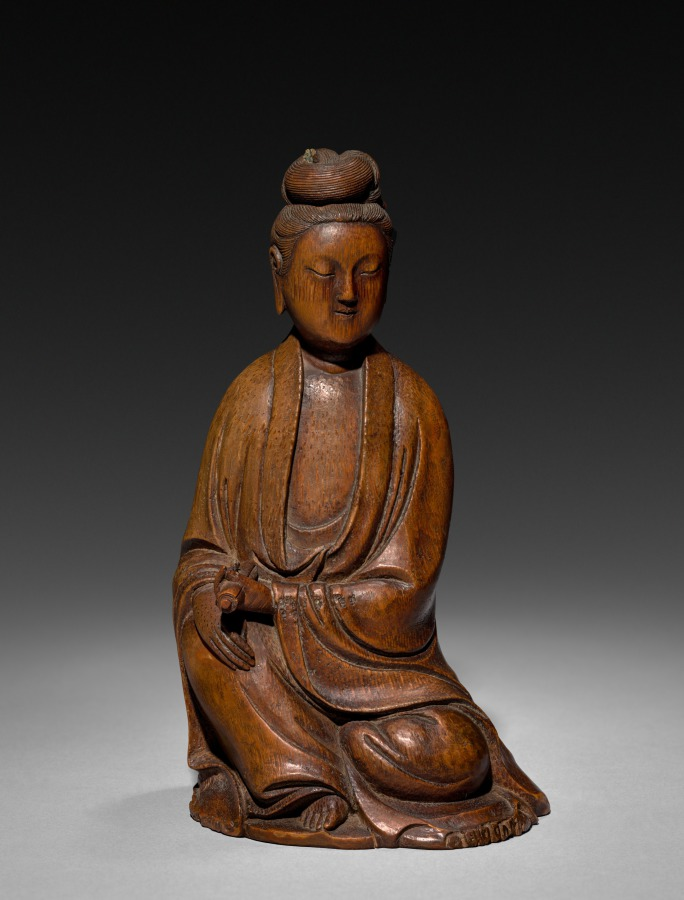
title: Seated Guanyin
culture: China, Qing dynasty (1644-1911)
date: 1600s-1700s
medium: bamboo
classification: Wood